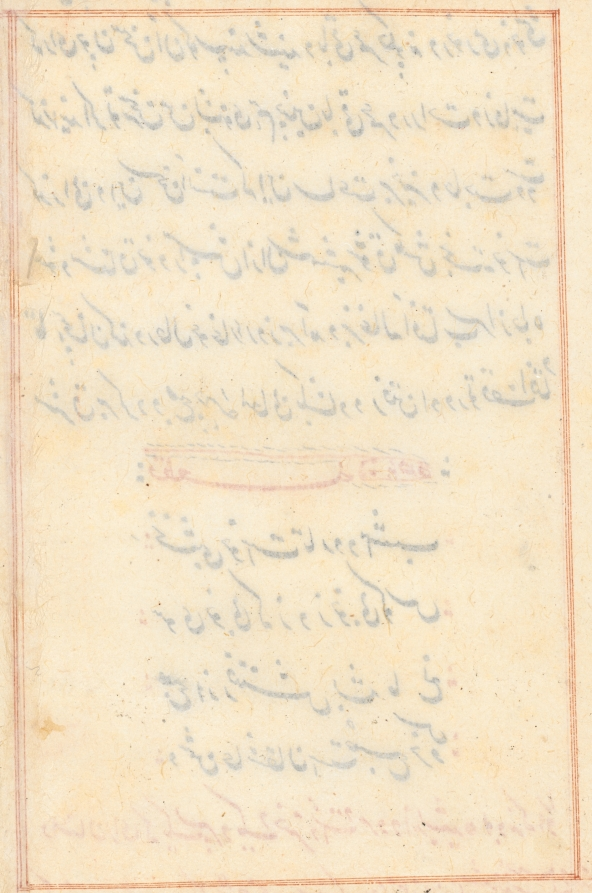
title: Page from Tales of a Parrot (Tuti-nama): text page (blank)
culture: Mughal India, court of Akbar (reigned 1556–1605)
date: c. 1560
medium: gum tempera, ink, and gold on paper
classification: Painting